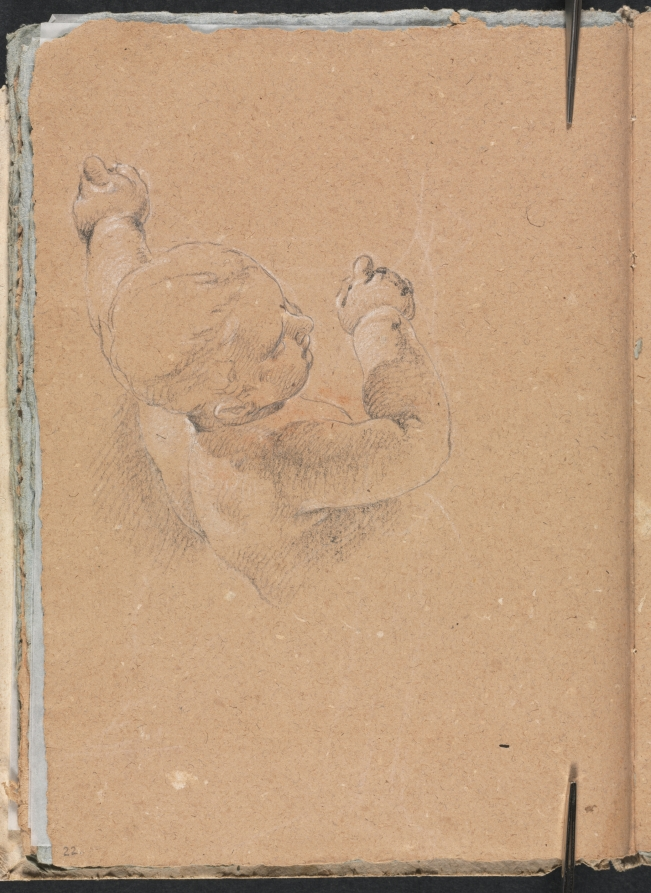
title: Verona Sketchbook: Putto (page 22)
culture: Italy, 18th century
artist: Francesco Lorenzi (Italian, 1723–1787)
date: 1760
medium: black chalk with white heightening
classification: Bound Volume